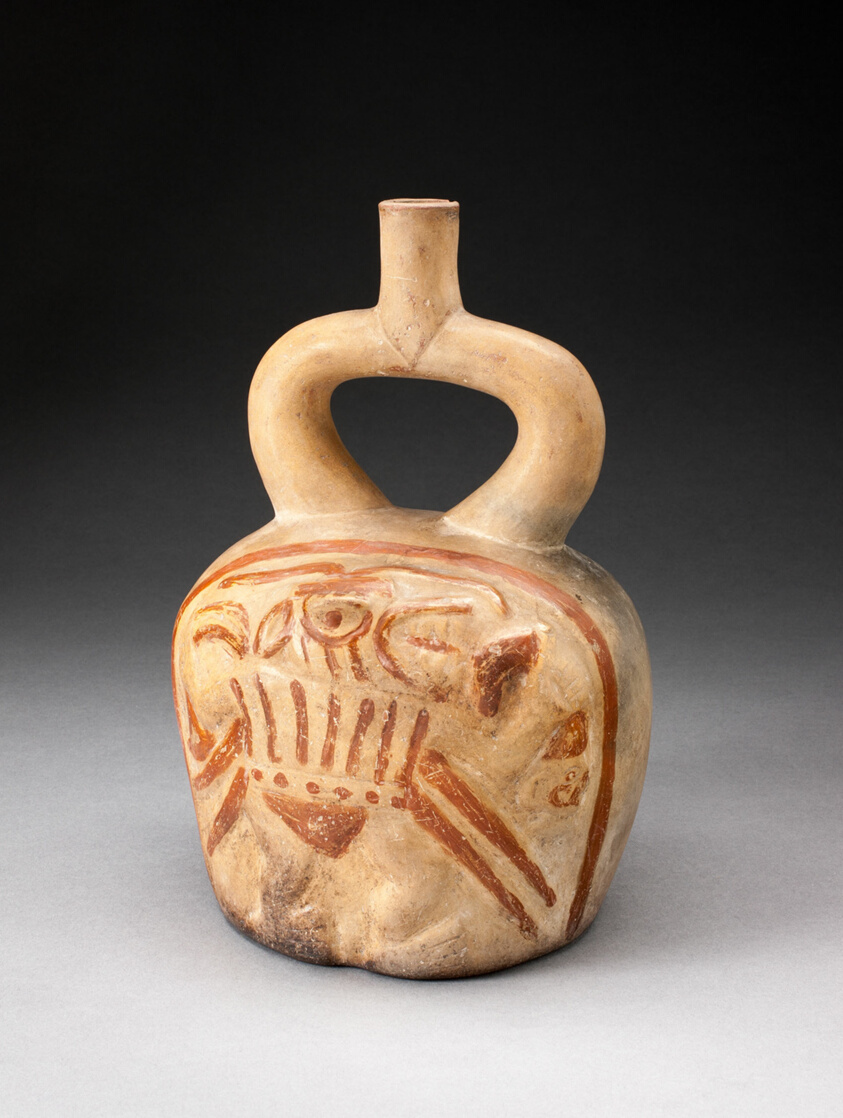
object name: Vessel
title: Stirrup Spout Vessel with Relief Depicting a Supernatural Figure Holding a Trophy Head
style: moche, andes, Arts of the Americas, south american, andean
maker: Moche (Chimbote, Santa Valley, north coast, Peru)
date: 100 BCE–500 CE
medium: Ceramic and pigment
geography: Peru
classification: earthenware; ceramics; vessel; art of the americas